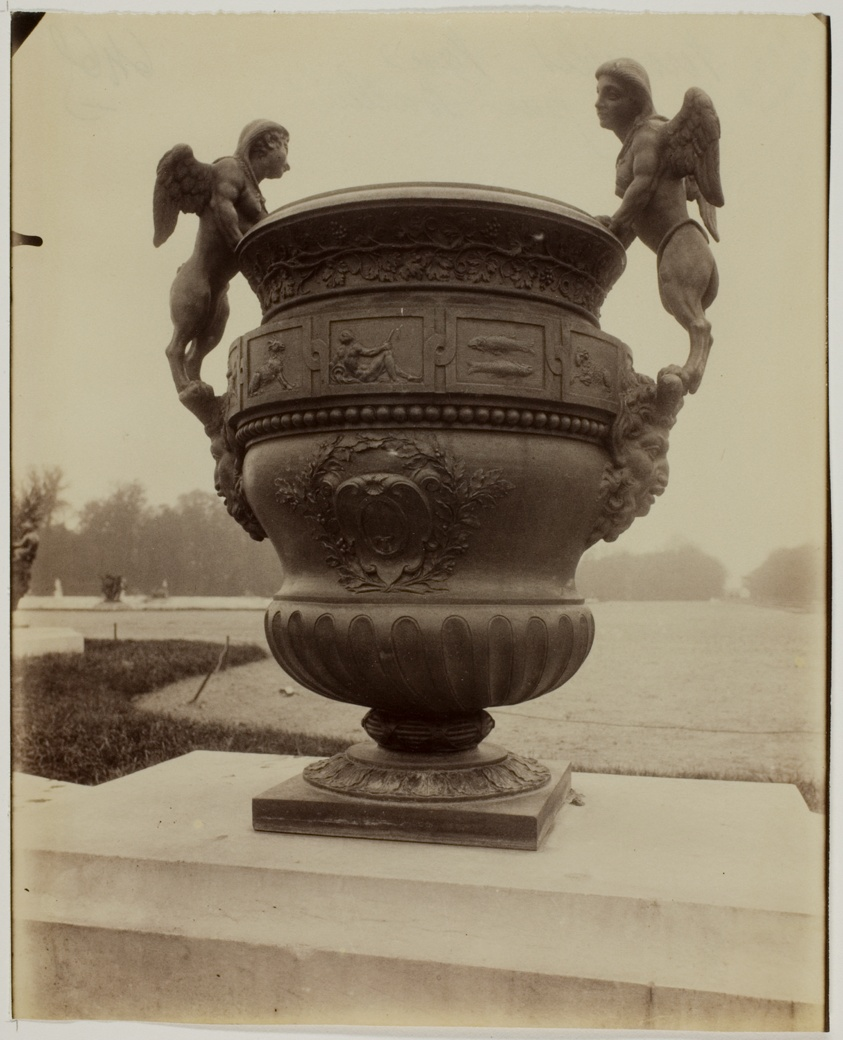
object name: Photograph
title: Versailles, Vase par Ballin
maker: Jean-Eugène-Auguste Atget (French, 1857–1927)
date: 1904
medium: Albumen print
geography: France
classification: albumen silver print; photographic process; photography; photograph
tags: Collected by Hugh Edwards